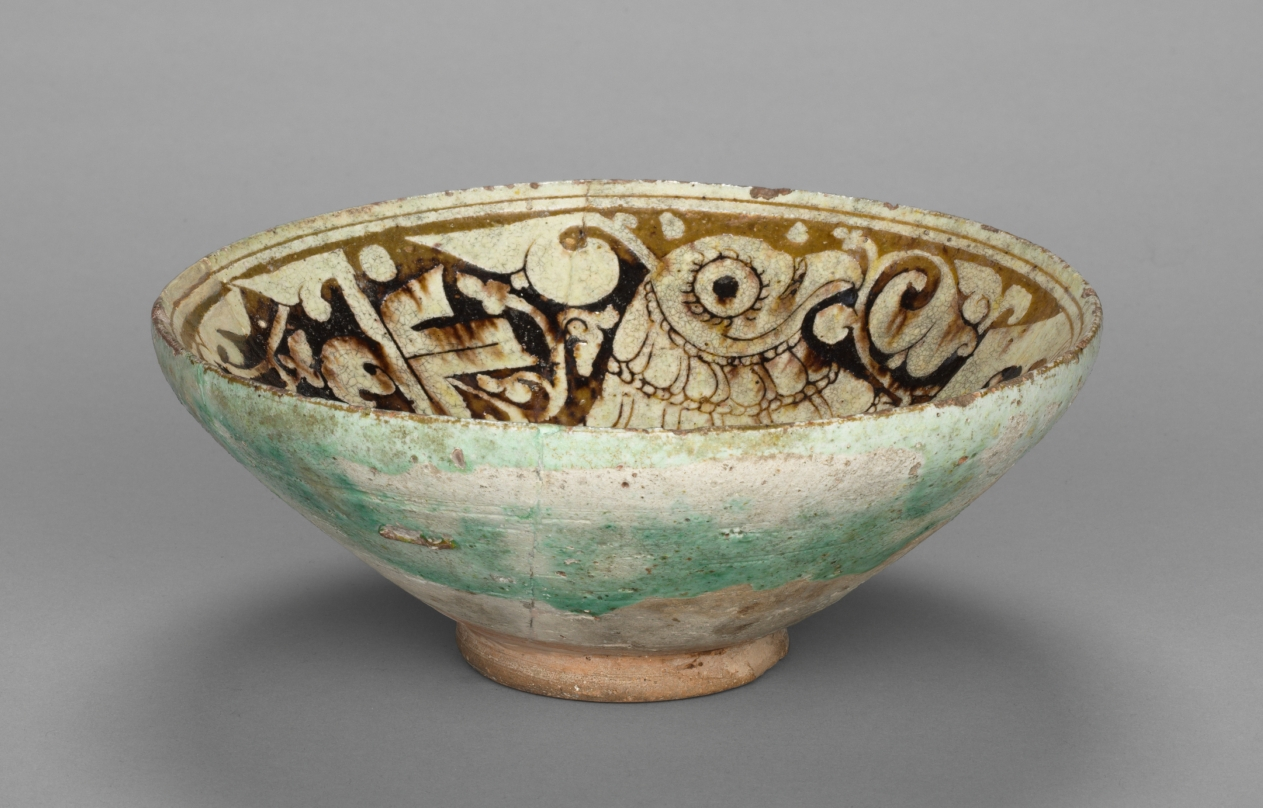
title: Bowl with Griffin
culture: Northwest Iran, Garrus district, Seljuk period, 12th century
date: 1100s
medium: earthenware with underglaze slip-painted decoration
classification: Ceramic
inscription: Arabic letters in floriated Kufic on griffon's hip (ta or sad?) and above his back (kaf?).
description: Animated animals, such as this griffin, and robust palmette scrolls characterize the bold designs that often appear on dark manganese backgrounds in Garrus ware, from northwestern Iran.